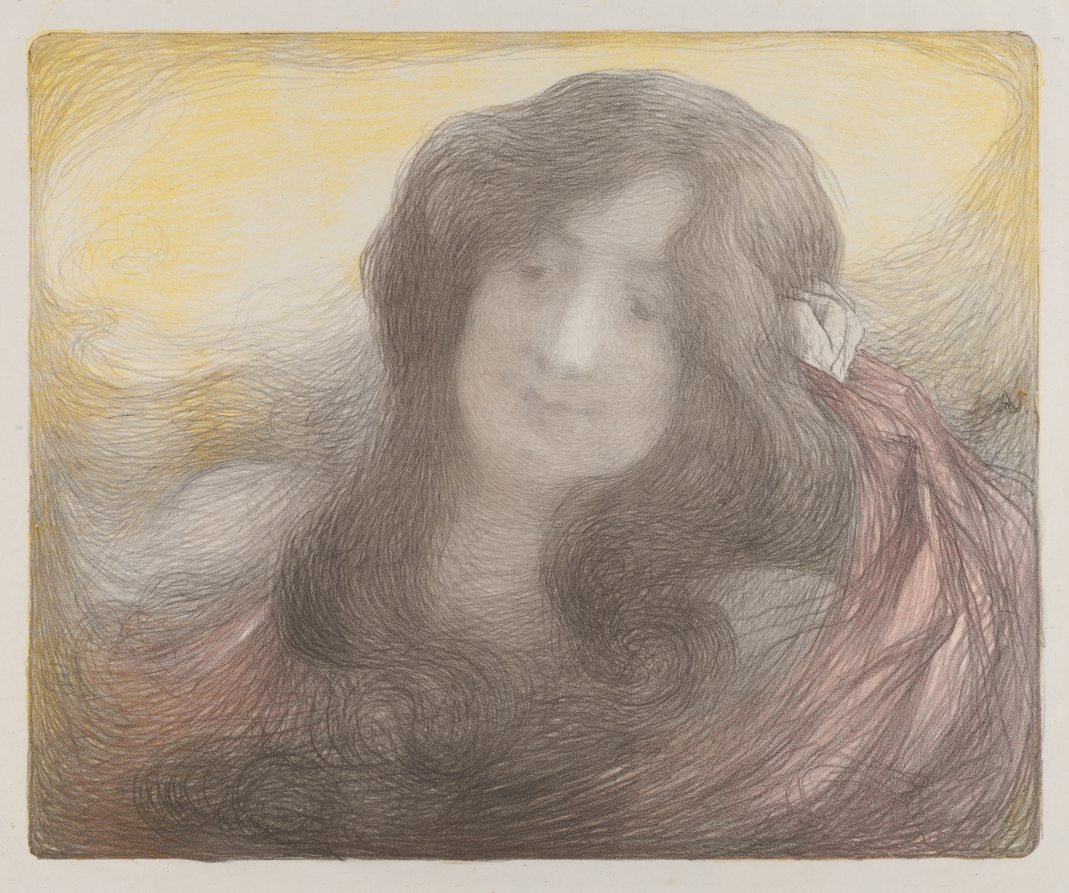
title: Girl with Long Hair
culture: France, 19th century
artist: Edmond François Aman-Jean (French, 1858–1936)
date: c. 1898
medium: color lithograph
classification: Print